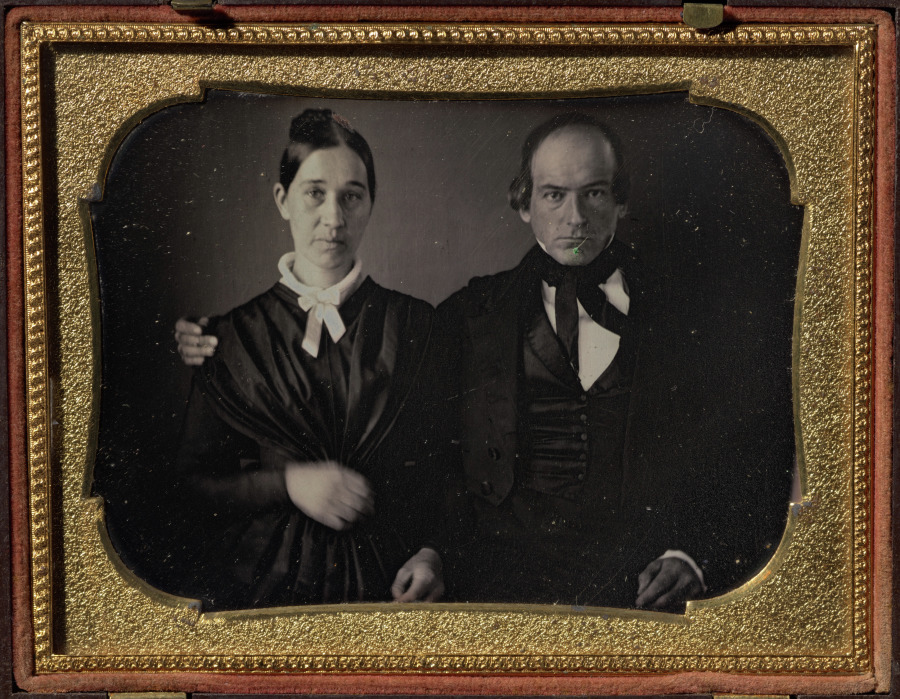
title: Parents of five children doing homework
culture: America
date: c. 1858–60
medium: daguerreotype, quarter plate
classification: Photograph